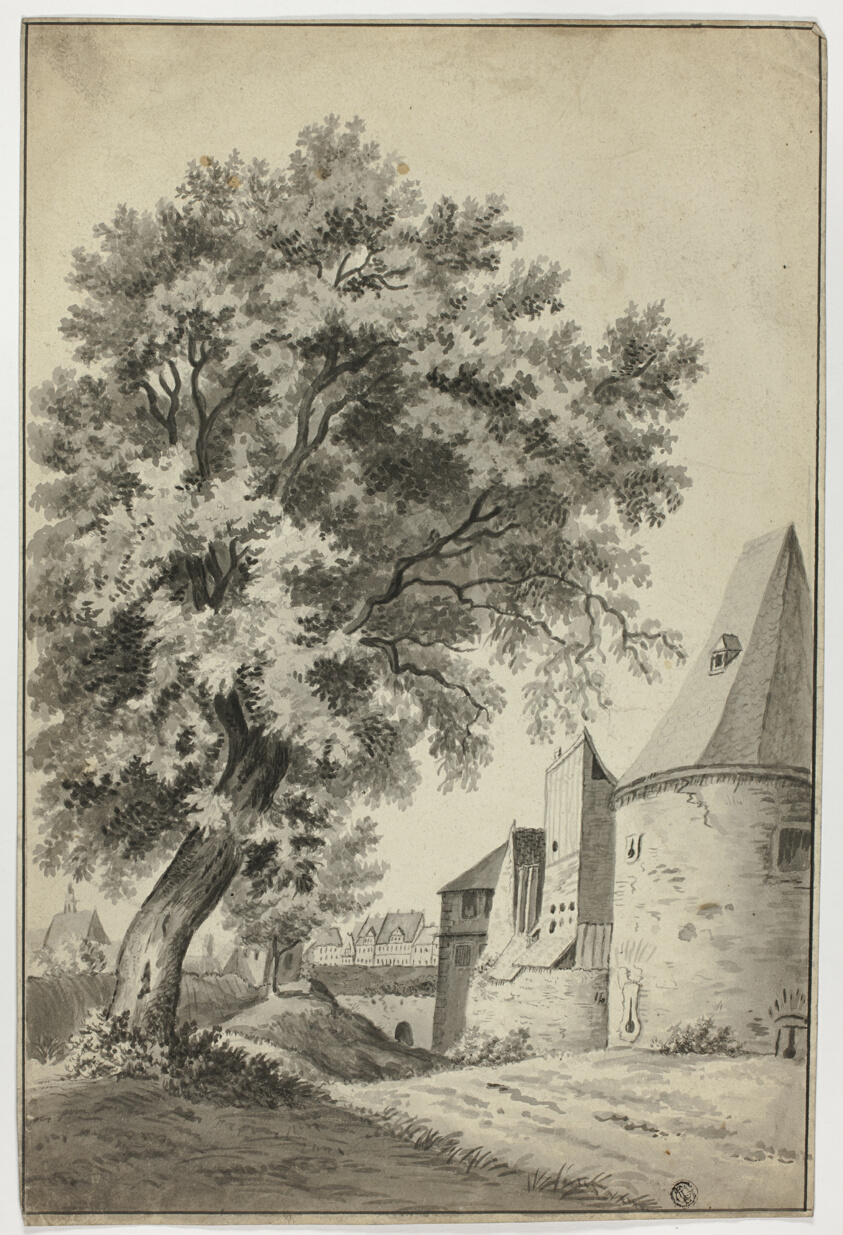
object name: Drawing and Watercolor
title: Walled Village and Tall Tree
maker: Unknown Artist; Flemish, 18th century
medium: Brush and black ink and gray wash on cream wove paper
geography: Flanders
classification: drawings (visual works); brush and wash; brush and ink; paper; prints and drawing